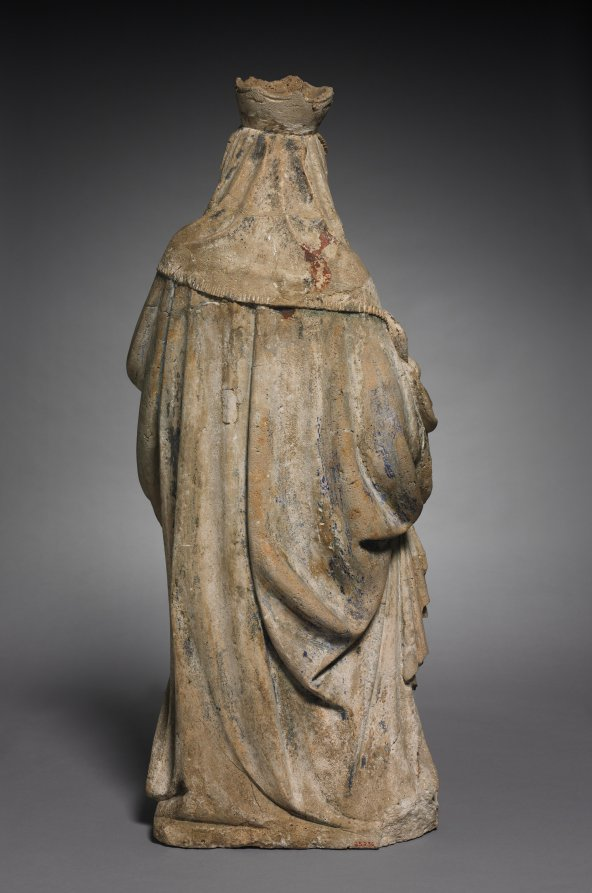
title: Virgin and Child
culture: Austria, Lungau, Church of Mariapfarr, late 14th century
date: c. 1395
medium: cast stone with traces of original paint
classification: Sculpture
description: This sculpture—damaged during the 1800s and now missing the figure of the Christ child—is a fine early example of the type known as the Schöne Madonna or "Beautiful Virgin." This type became popular around 1400 and emphasized the graceful curve of the Virgin’s posture combined with deep, slightly exaggerated drapery folds. This sculpture is known to have come from the Church of Mariapfarr in the Diocese of Salzburg. It was made using a casting technique known as "lost shape." The casting consisted of pulverized limestone combined with quicklime and milk curd poured into a mold. After the cementlike mixture set for several weeks, the mold was destroyed to remove the sculpture, which could then be filed, polished, and painted.